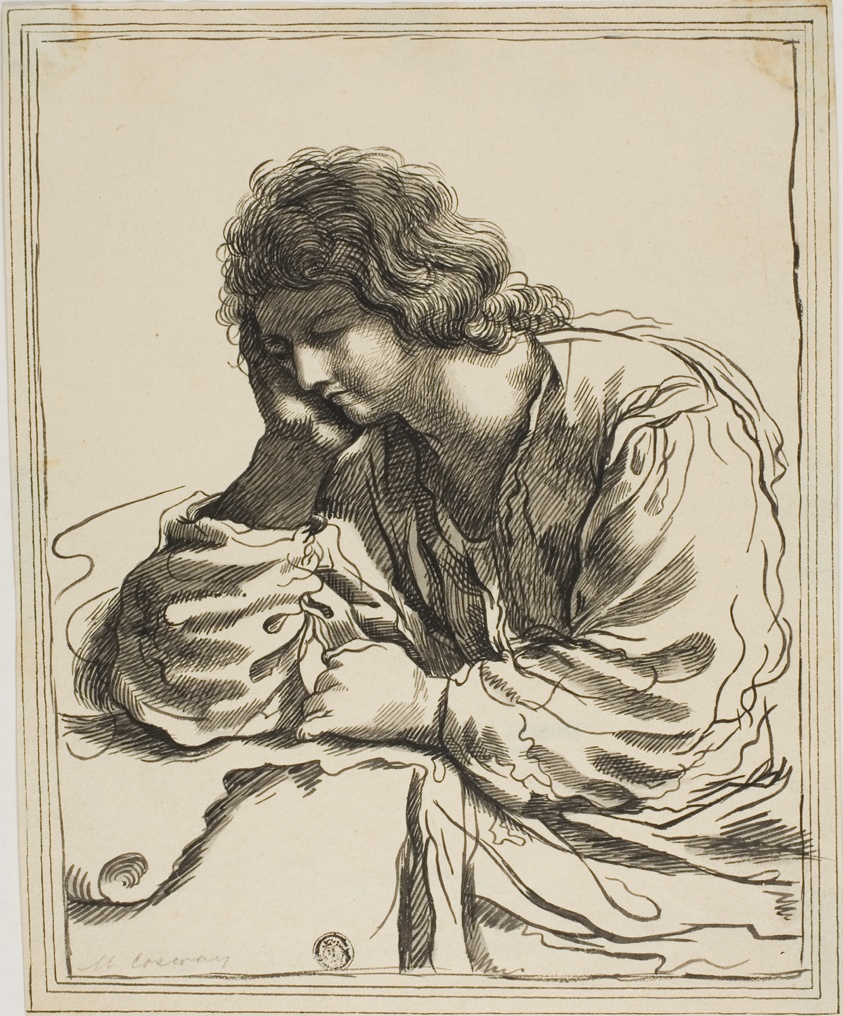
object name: Drawing and Watercolor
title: Saint John the Evangelist in Meditation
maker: After Guercino; Italian, 1591-1666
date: 1800s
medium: Pen and brush and black ink, with brush and gray wash, on cream wove paper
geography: Italy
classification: pen and ink drawings; drawings (visual works); prints and drawing